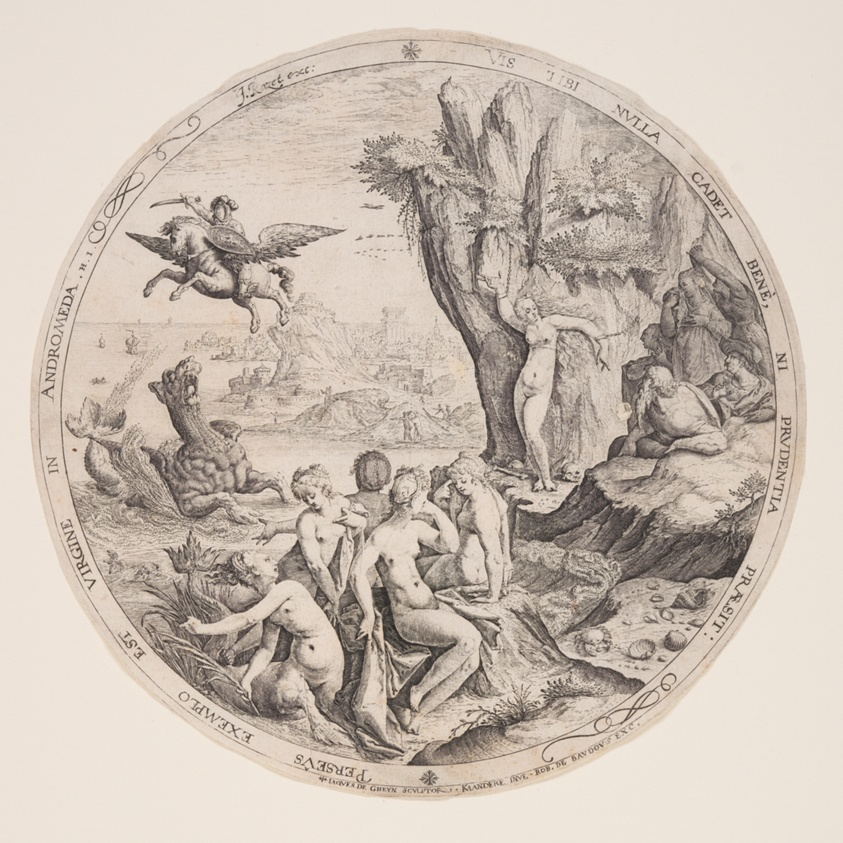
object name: Print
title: Perseus Liberating Andromeda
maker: Jacques de Gheyn II (Dutch, 1565–1629); after Karel van Mander (Dutch, 1548–1606)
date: 1588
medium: Engraving on laid paper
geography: Netherlands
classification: engraving; paper; print; prints and drawing